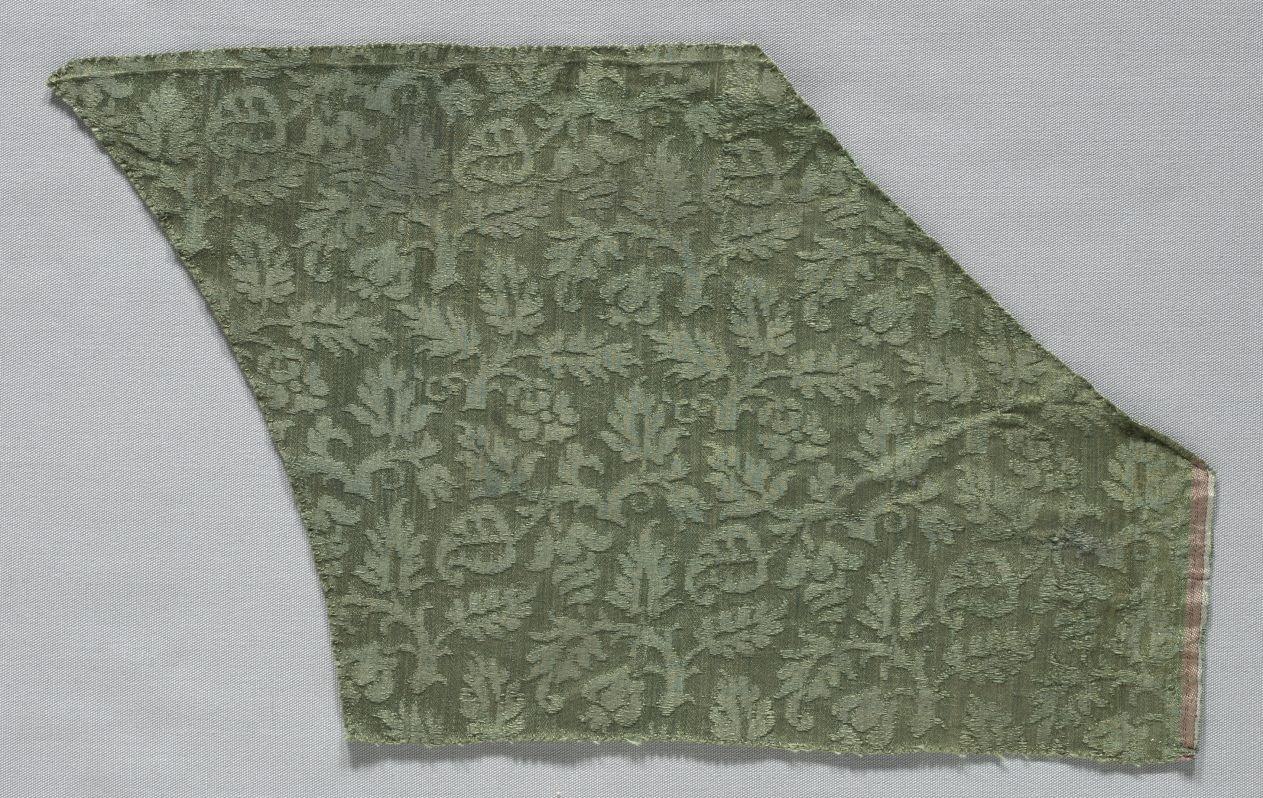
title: Silk Damask Fragment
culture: Italy, 16th century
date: 1500s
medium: damask, silk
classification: Textile